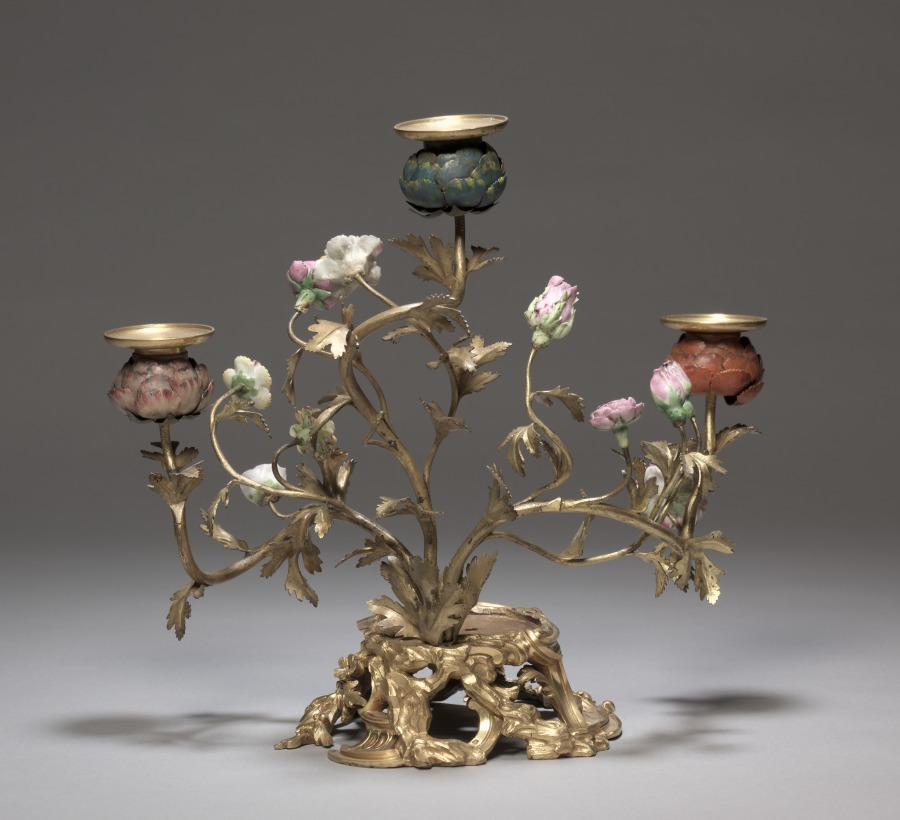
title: Candelabrum with Parrot (Candelabrum)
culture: France, style of Louis XV, 18th century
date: c. 1750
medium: gilt bronze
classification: Furniture and woodwork